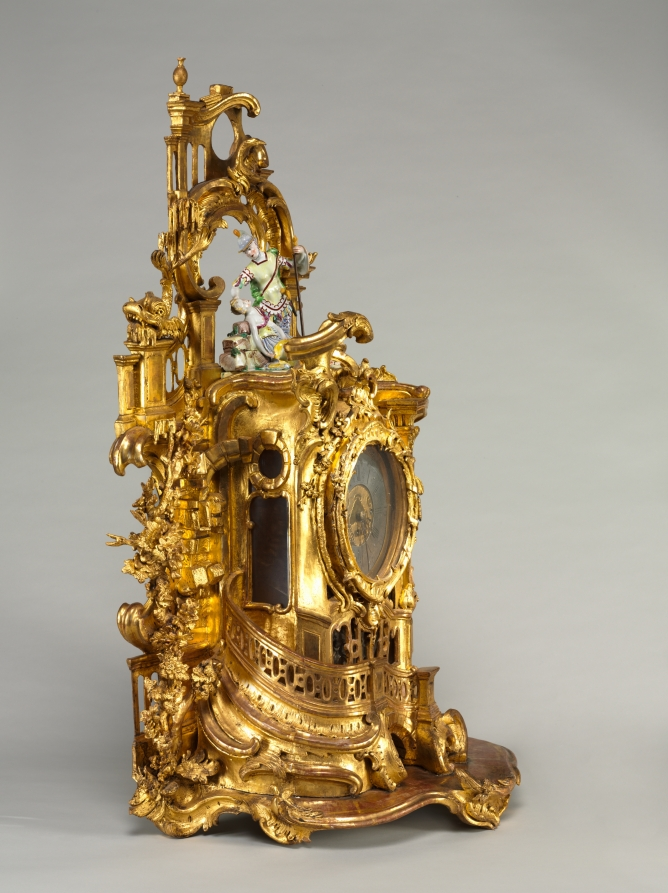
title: Clock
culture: Germany, 18th century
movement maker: Baumgartinger (German)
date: c. 1750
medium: carved and gilded wood, faience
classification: Furniture and woodwork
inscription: inscribed on face: Baumgartnger [sic] Mergentheim.